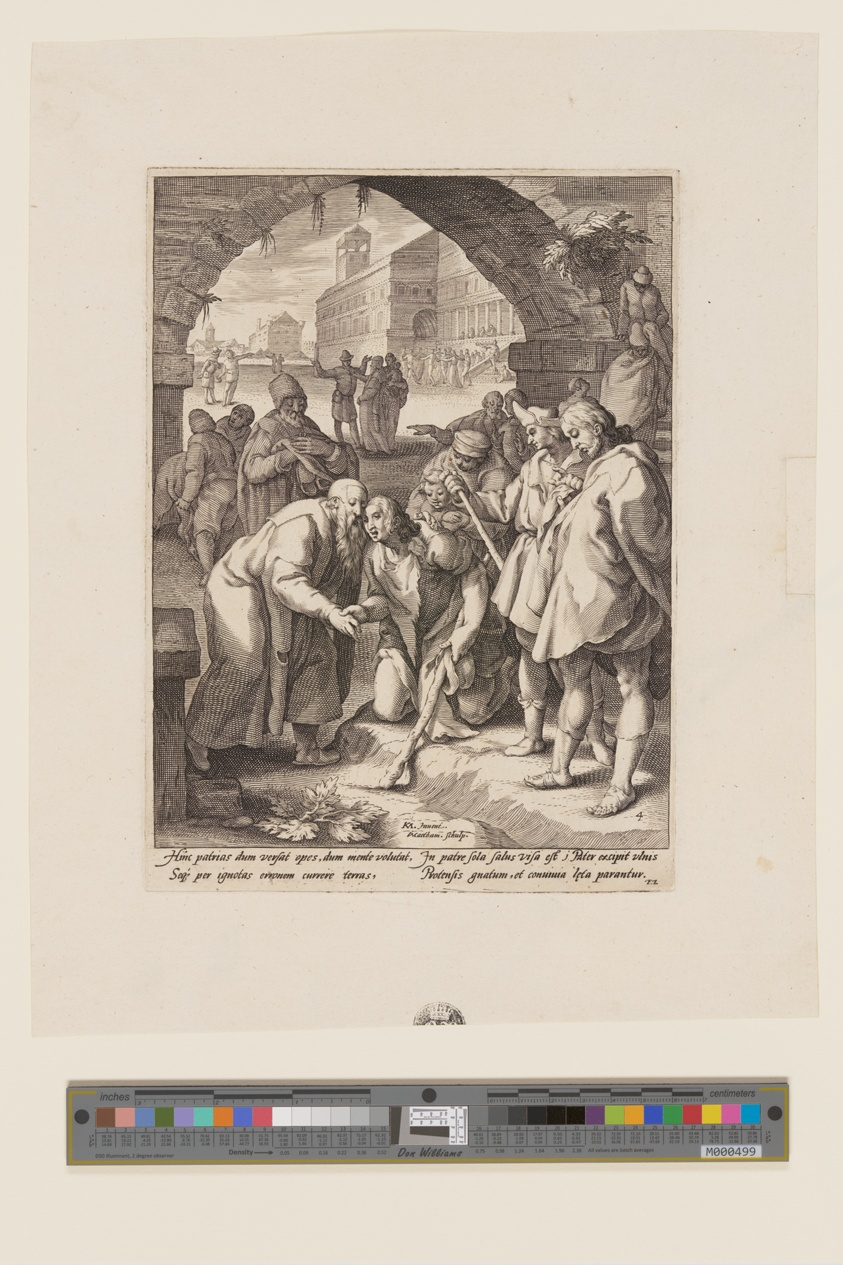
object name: Print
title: The Return of the Prodigal Son, from The History of the Prodigal Son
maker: Jacob Matham (Dutch, 1571–1631); after Karel van Mander (Dutch, 1548–1606)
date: 1592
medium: Engraving on ivory laid paper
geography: Netherlands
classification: engraving; paper; print; prints and drawing